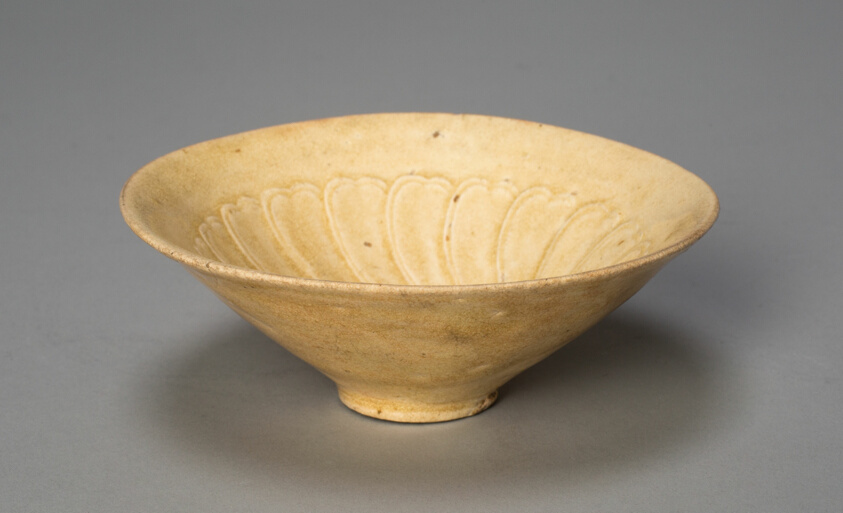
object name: Vessel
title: Cup with Overlapping Petals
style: Chinese (culture or style)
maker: China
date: Song dynasty (960–1279)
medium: Glazed stoneware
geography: China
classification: drinking vessel; asian art; ceramics; vessel